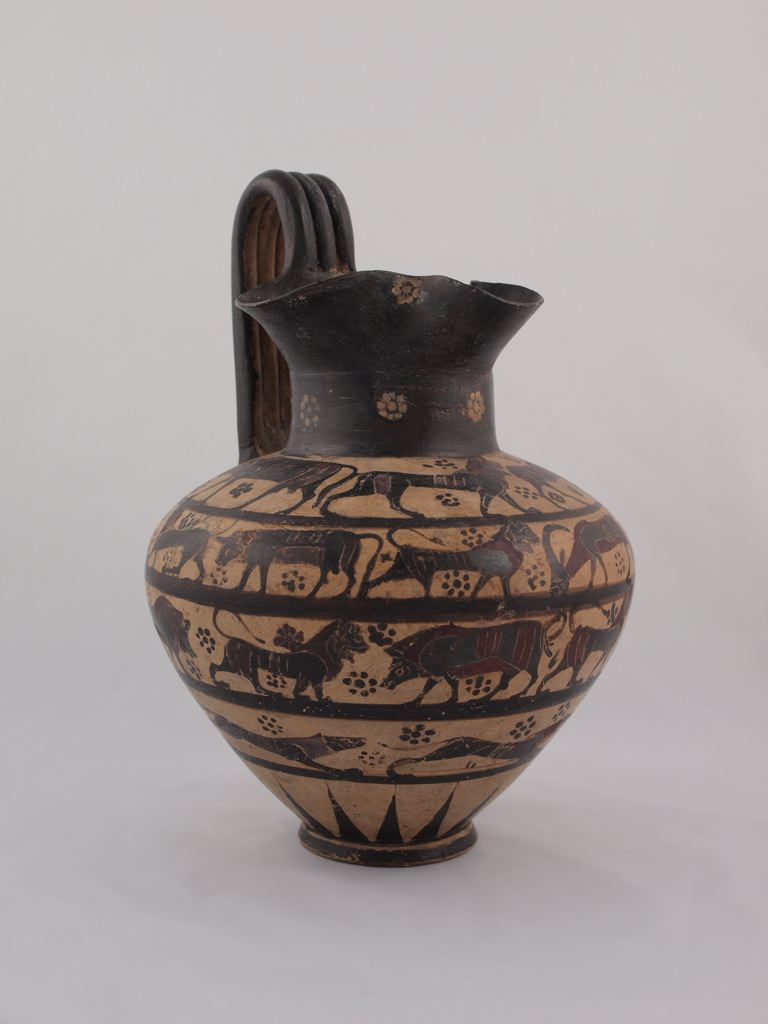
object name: Vessel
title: Oinochoe (Pitcher)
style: corinthian (pottery style), black-figure, ancient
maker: Greek; Corinth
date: 640-625 BCE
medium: terracotta, black-figure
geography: Corinth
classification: pitcher (vessel); earthenware; ceramics; vessel; ancient art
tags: animals, dogs, drinking, bull, lions